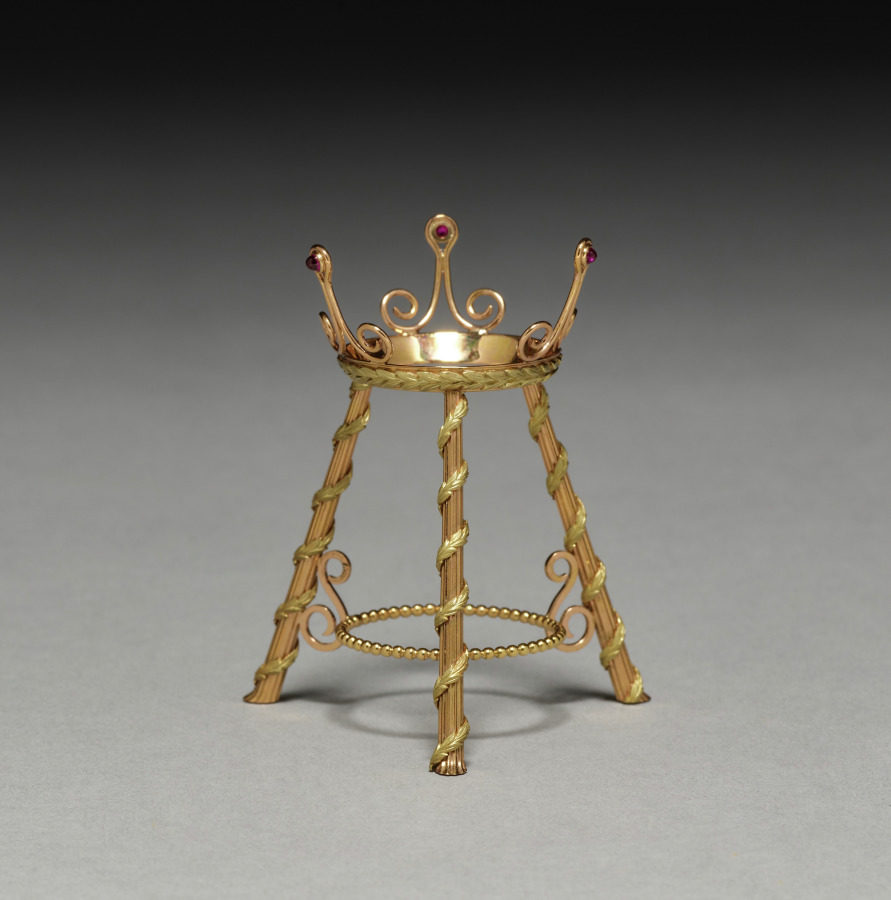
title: Gold Stand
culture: Russia, St. Petersburg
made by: Alexander Edward Tillander (Russian, 1837–1918)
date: before 1896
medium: gold, enamel, sapphire, gold easel and stand, photograph covered with faceted green glass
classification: Miscellaneous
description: In the Russian Orthodox religious tradition, eggs are offered as Easter gifts to symbolize rebirth, renewal, and the resurrection of Christ. This jeweled Russian egg is engraved with XB symbolizing the phrase, “Christ is risen,” and would have been given to a lady in a wealthy household, perhaps someone of high rank within the imperial court, given the richness of materials.